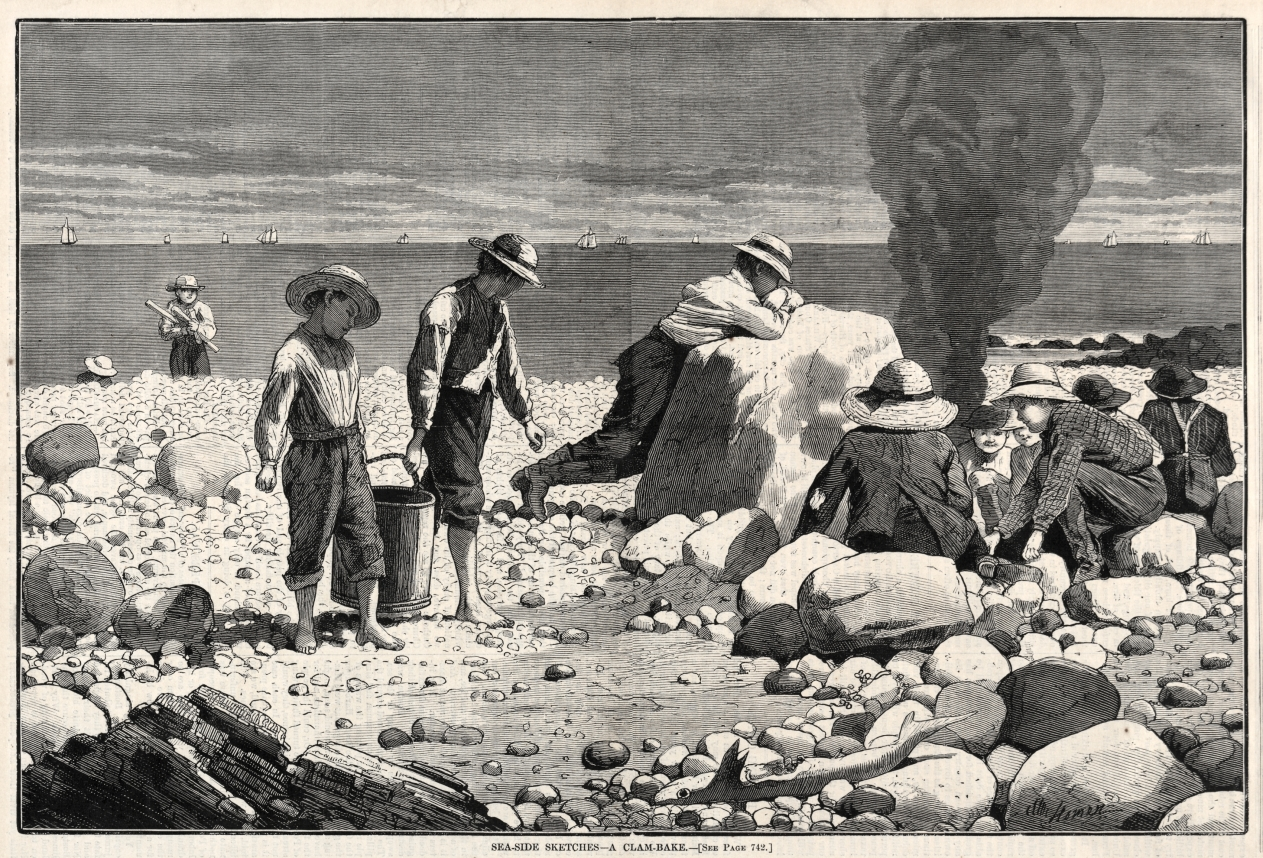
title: Seaside Sketches - A Clam-Bake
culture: America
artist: Winslow Homer (American, 1836–1910)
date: 1873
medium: wood engraving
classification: Print